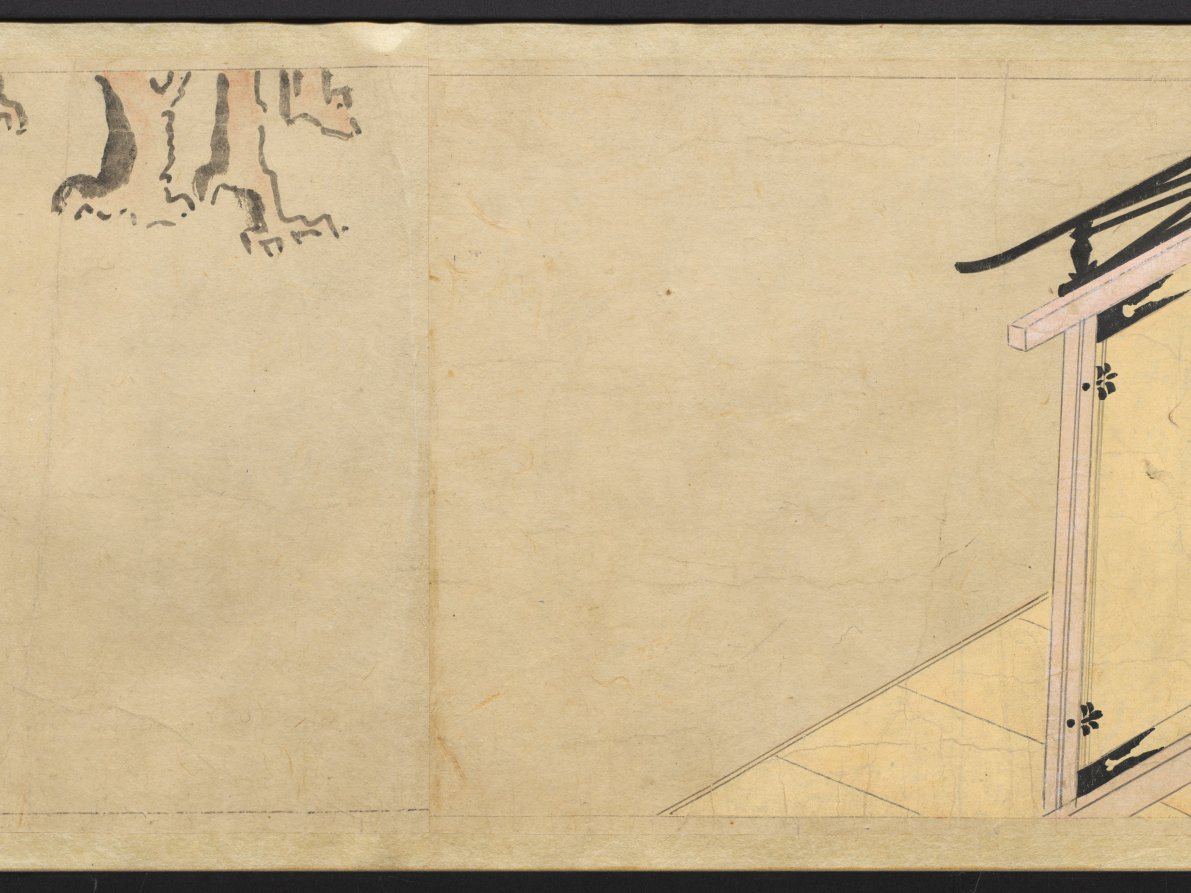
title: The Saltmaker's Story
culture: Japan, Edo period (1615–1868)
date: early 1600s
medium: One of a pair of handscrolls; ink, color, and gold on paper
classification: Painting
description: Once read and copied by girls at New Year’s celebrations and included in dowries, The Saltmaker’s Story is a rags-to-riches tale in which daughters are gifts from the gods. Despite his simple outlook, the main character progresses from humble roots as an associate at Kashima Shrine to the elite status of grandfather of the emperor through the intervention of the Kashima deity. The Saltmaker’s Story is traditionally presented in a set of three scrolls, but the text of this set has been removed by a previous owner, who remounted the illustrations as a pair. The paintings of this one take us from right to left through the second half of the tale.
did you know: This handscroll originally had texts before its paintings, but the texts were removed.